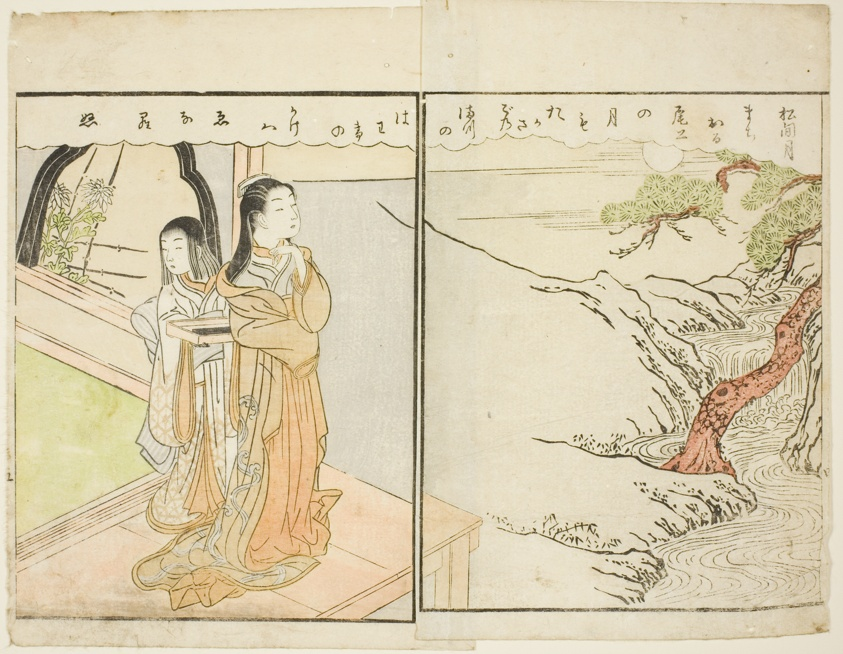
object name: Print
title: Double-page Illustration from Vol. 2 of "Picture Book of Spring Brocades (Ehon haru no nishiki)"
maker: Suzuki Harunobu 鈴木 春信; Japanese, 1725 (?)-1770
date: 1771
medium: Color woodblock print; double-page illustration from book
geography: Japan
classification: woodblock print; print; asian art